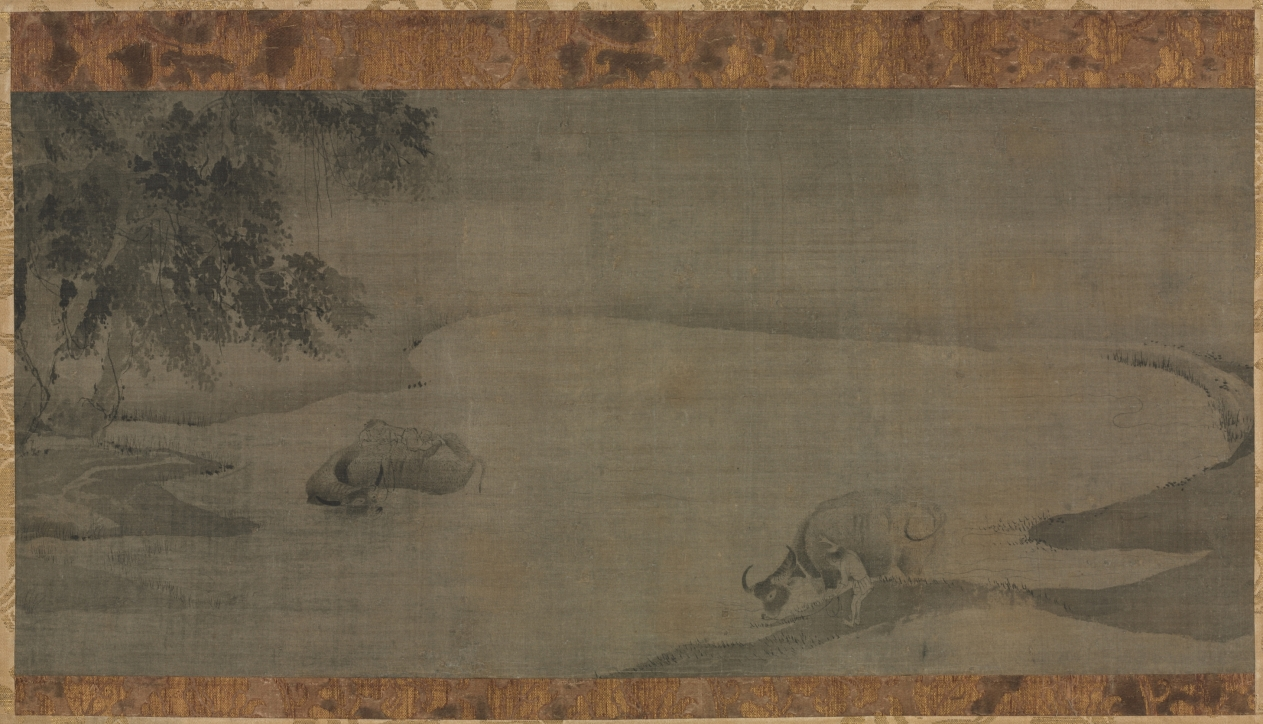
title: Water Buffalo and Herdboys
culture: China, Yuan dynasty (1271-1368)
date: late 1200s–early 1300s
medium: Hanging scroll; ink on silk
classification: Painting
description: In southern China, farmers use water buffalos to help plow their fields, which children often tend. In Buddhist teachings, the subject of herding or taming an ox was used to illustrate the 10 steps to enlightenment, or spiritual awakening. A single image may be read as a metaphorical representation of the Chan process of attaining enlightenment, the difficulty of which was likened to that of finding a strayed buffalo. Here, a buffalo is watered by a boy, another takes a bath in the pond. Chan paintings introduced to Japan were often remounted to fit them into niches for display (tokonoma), which explains the painting’s current format.